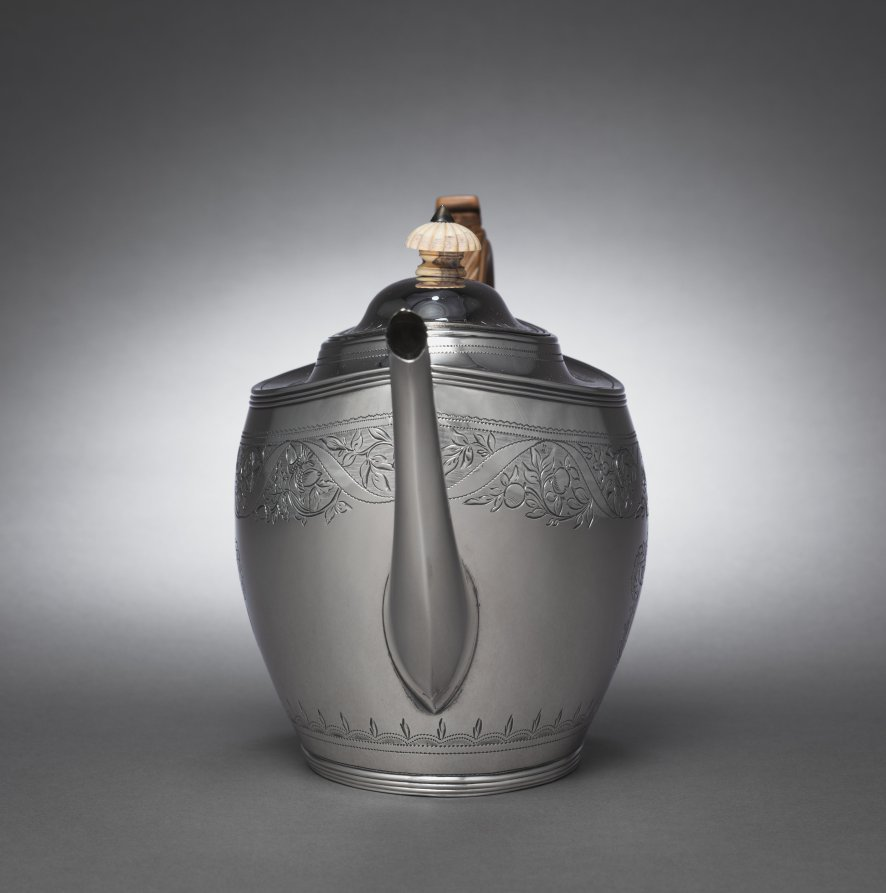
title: Tea Service (Teapot)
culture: London, England, 19th century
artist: Anne Bateman (British, 1748–1813)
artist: Peter Bateman (British, 1740–1825)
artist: William (I) Bateman (British, 1774–1850)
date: 1801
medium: silver, ivory, wood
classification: Silver